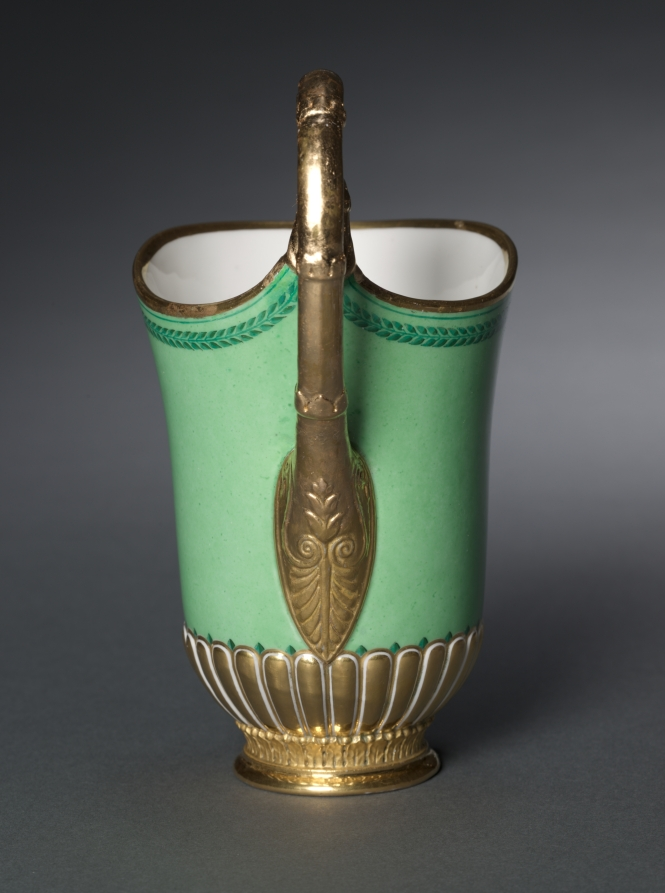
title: Cream Jug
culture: France, 18th-19th century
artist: Sèvres Porcelain Factory (French, est. 1756)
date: designed 1788, made 1831–1834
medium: gilt porcelain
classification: Ceramic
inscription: R...R(?)-34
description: The pattern for this cream jug was originally designed for Marie-Antoinette, queen of France, in 1788